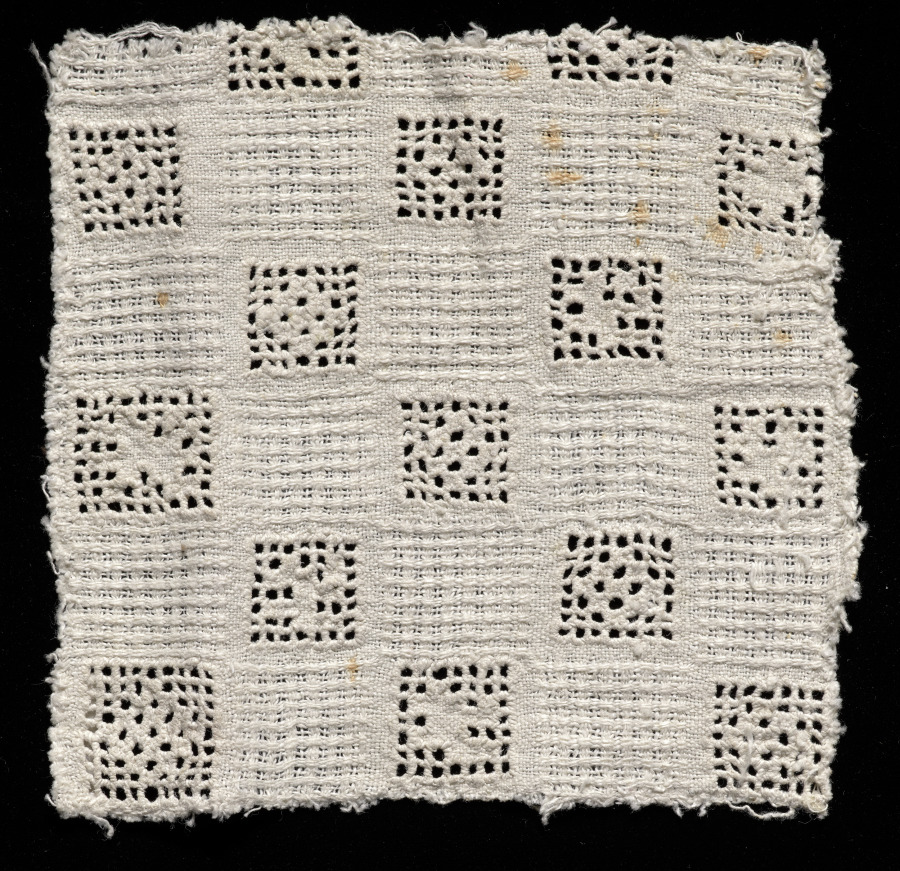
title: Lace fragment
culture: Italy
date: 1560–1599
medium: Linen: needle lace (drawnwork) insertion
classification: Lace